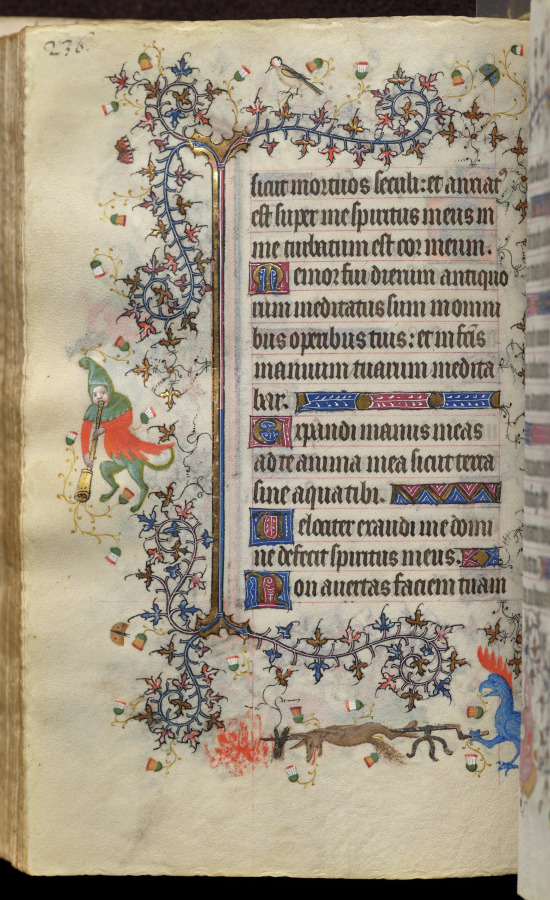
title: Hours of Charles the Noble, King of Navarre (1361-1425): fol. 118v, Text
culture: France, Paris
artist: Master of the Brussels Initials and Associates (French)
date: c. 1405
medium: ink, tempera, and gold on vellum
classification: Bound Volume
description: This precious volume was obviously highly prized by its owner, the French-born King of Navarre, who had his coat of arms painted on no less than twenty folios. Rather than directly commissioning this manuscript from a specific workshop, it seems that Charles the Noble acquired his book of hours -- perhaps ready-made for the luxury market -- while on a trip to Paris in 1404-05. A collaborative effort, six painting styles are evidenced within the pages of this codex, those of two Italians, two Frenchmen, and two Netherlanders. The painter who was responsible for the planning and decoration of the book, and who produced seventeen of the large miniatures, was a Bolognese artist known as the Master of the Brussels Initials. His principal assistant, responsible for most of the borders, was a Florentine who signed his name "Zecho" da Firenze on folio 208 verso.